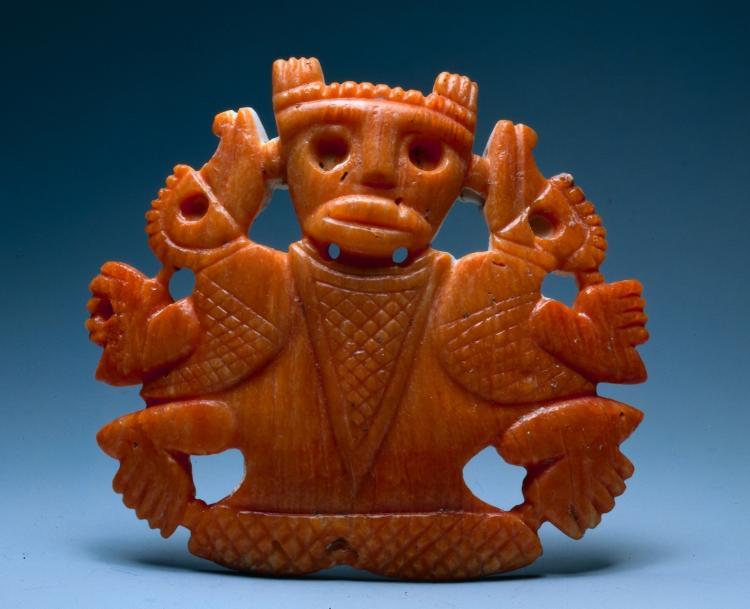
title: Figure-and-Birds Pendant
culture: Costa Rica, Atlantic Watershed region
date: c. 300–700 CE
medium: spondylus (thorny oyster) shell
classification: Jewelry